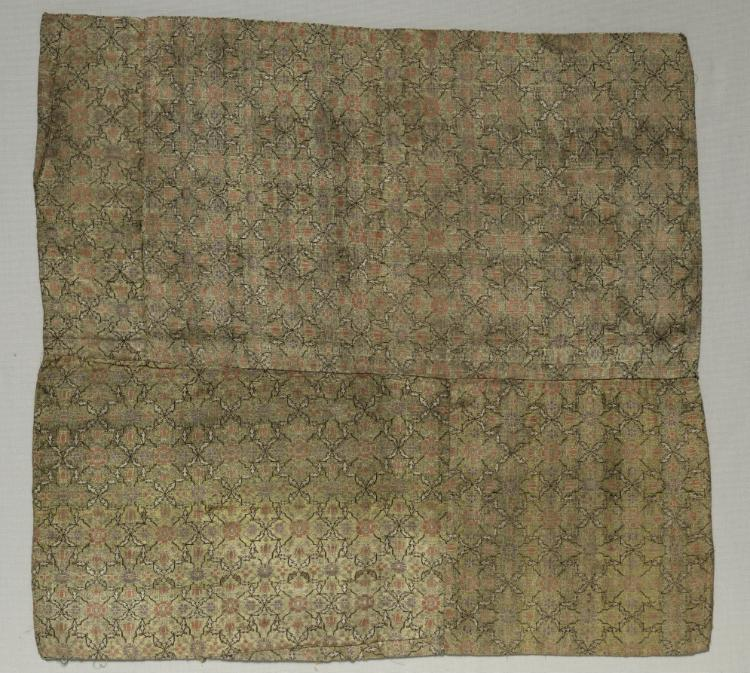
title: Fragment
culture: Iran, 19th c.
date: 1700s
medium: Silk taquete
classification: Textile